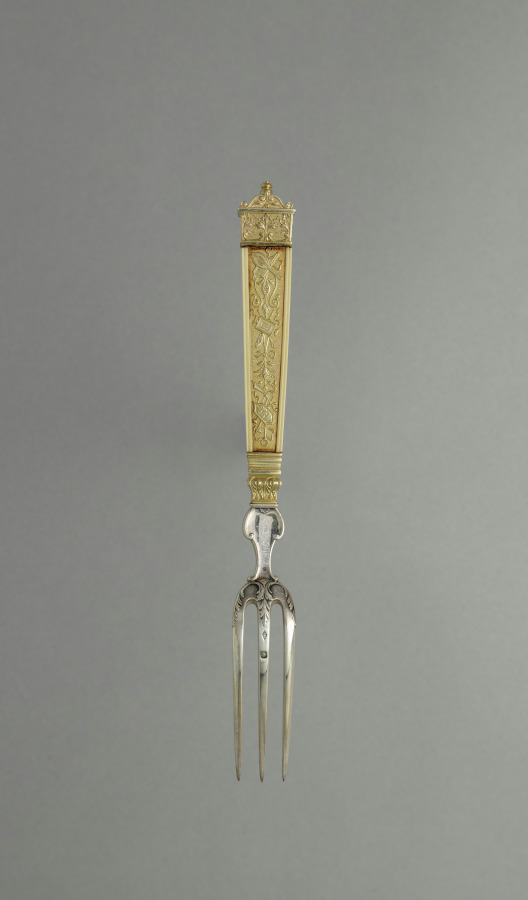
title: Dessert Fork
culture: France, 19th century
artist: Maison Cardeilhac (French)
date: c. 1880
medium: gilt silver and ivory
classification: Silver